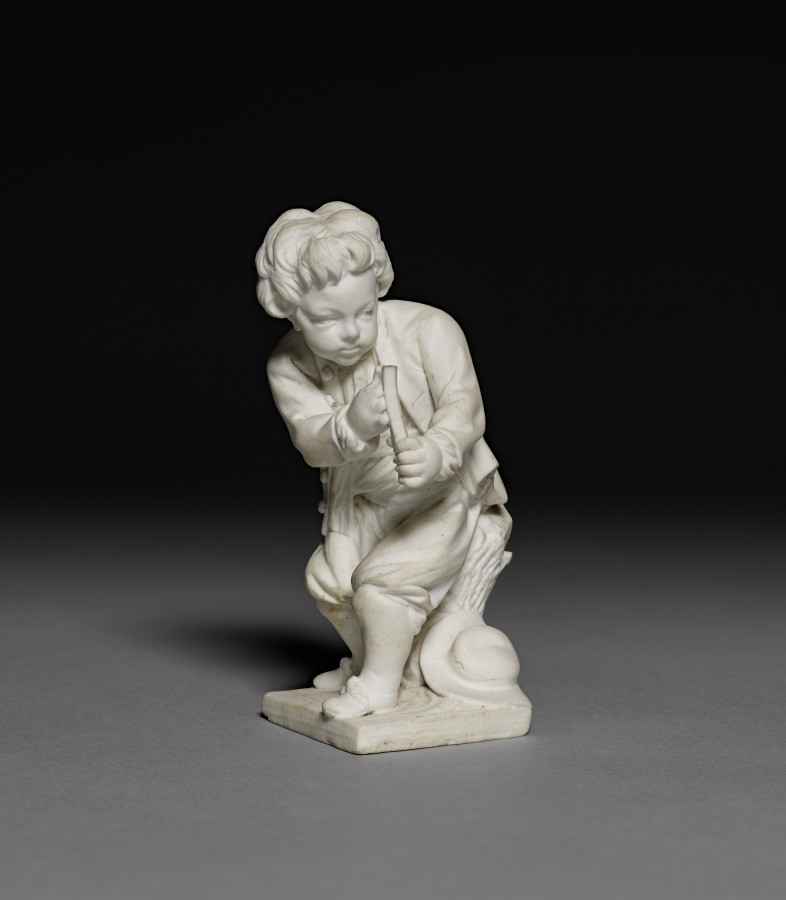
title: Figure of a Mischief Maker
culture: France, Sèvres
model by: Etienne-Maurice Falconet (French, 1716–1791)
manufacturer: Sèvres Porcelain Factory (French, est. 1756)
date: 1766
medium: Unglazed soft-paste porcelain (biscuit)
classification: Ceramic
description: Over a period of three years, designs for 17 young children involved in various activities were issued by sculptor Étienne-Maurice Falconet after which they were regularly reproduced as porcelain figurines. This figure, who pulls back a slingshot, would have been modeled after one of these designs. Decorative figurines like these were often included in elaborate dining services to be placed about a table along with the usual tureens and tableware.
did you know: Thirty-one figures modeled after Falconet’s series were included in the dinner service given by French King Louis XV to Christian VII, King of Denmark, in 1768.